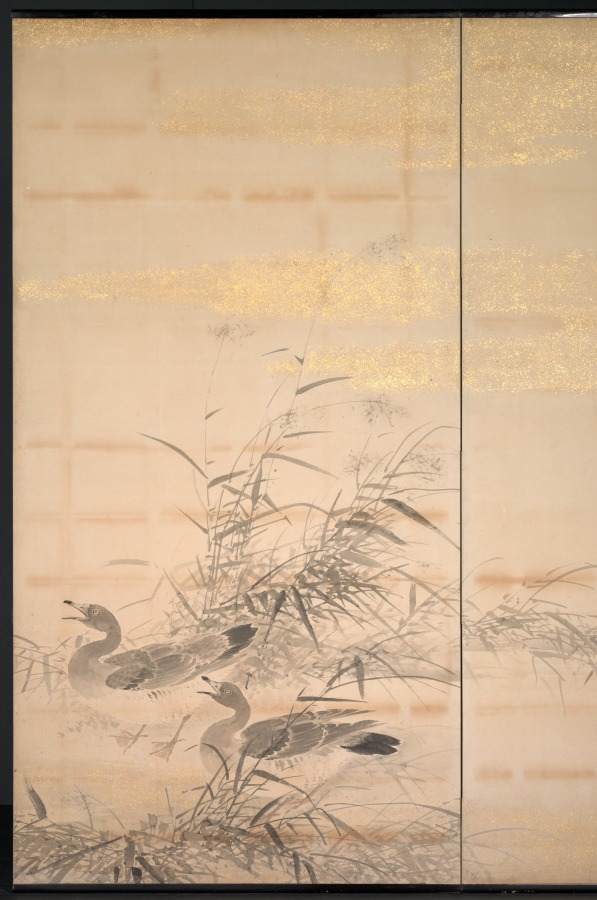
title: Geese, Reeds, and Water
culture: Japan, Edo period (1615–1868)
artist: Yamamoto Baiitsu (Japanese, 1783–1856)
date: 1800s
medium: One of a pair of four-panel folding screens; ink, color, and cut gold foil on paper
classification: Painting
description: This byōbu composition differs from most in that it comprises two four-panel screens, rather than two six-panel units. Since the current mounting is modern, it is impossible to determine whether its present configuration represents its original design. Some panels may have been removed to help the screens better fit into a modern interior space. Baiitsu worked almost exclusively in monochromatic ink tones and favored classical Chinese painting themes.